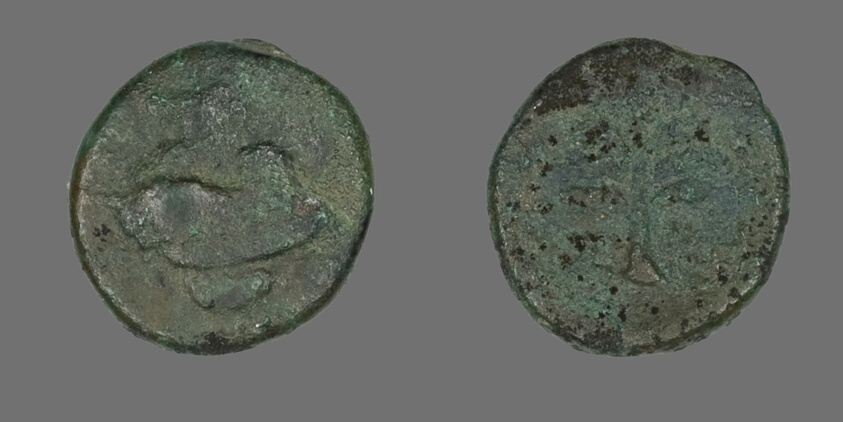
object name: Coin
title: Coin Depicting Pegasus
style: greek, ancient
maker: Greek, minted in Skepsis, Troad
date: about 400-310 BCE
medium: Bronze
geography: Ancient Greece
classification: coin; ancient art